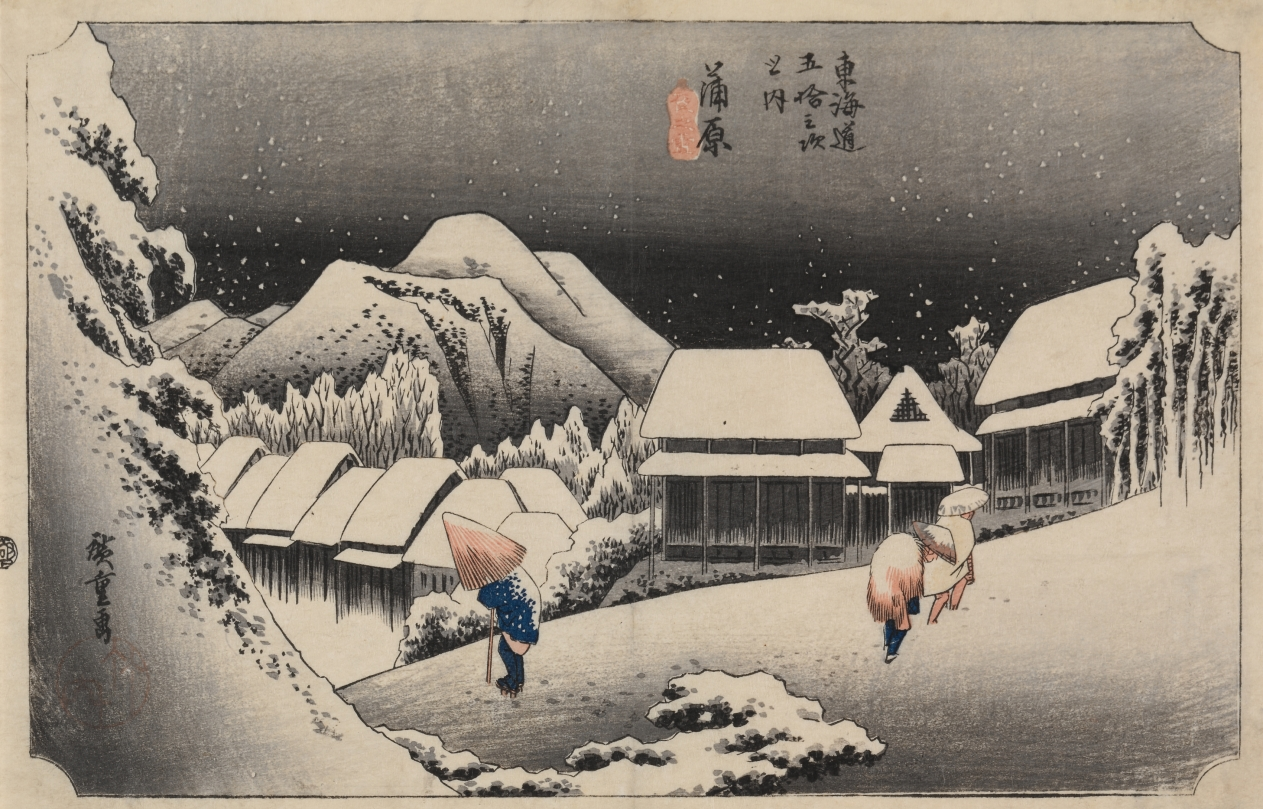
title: Evening Snow at Kambara (number sixteen of the series Fifty-three Stations of the Tokaido)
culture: Japan, Edo period (1615–1868)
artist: Utagawa Hiroshige (Japanese, 1797–1858)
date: 1833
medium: color woodblock print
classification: Print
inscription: Signature: Hiroshige ga. Publisher: Takenouchi Magohachi (Takenouchi). Censorship Seal: kiwame.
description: The coastal town of Kambara rarely experiences snowfall. Illustrating falling snow is particularly suited to woodblock prints. The snowflakes are created by carving their shapes out of the woodblock. When the surface of the block is inked and printed, the carved areas are represented by the unprinted white paper. This print may be the first by Hiroshige to depict falling snow.